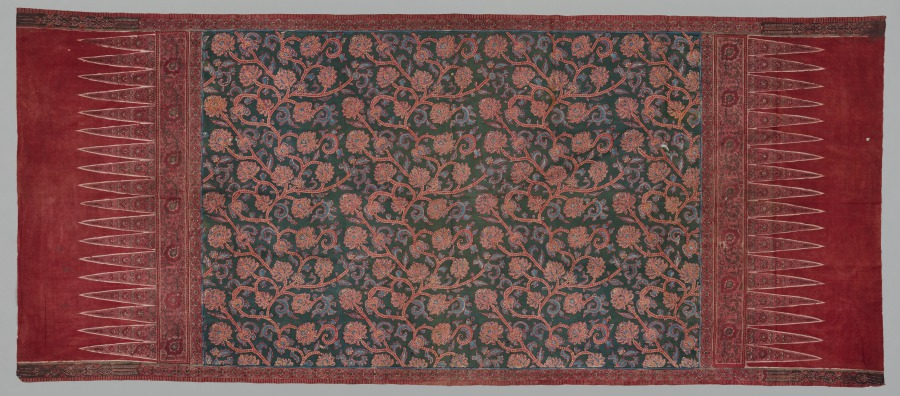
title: Hip Wrapper (tapis)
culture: India, Coromandel Coast, 1st half 19th Century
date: 1800–1850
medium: cotton; plain weave; block printed, drawn resist, painted mordants, dyed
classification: Textile